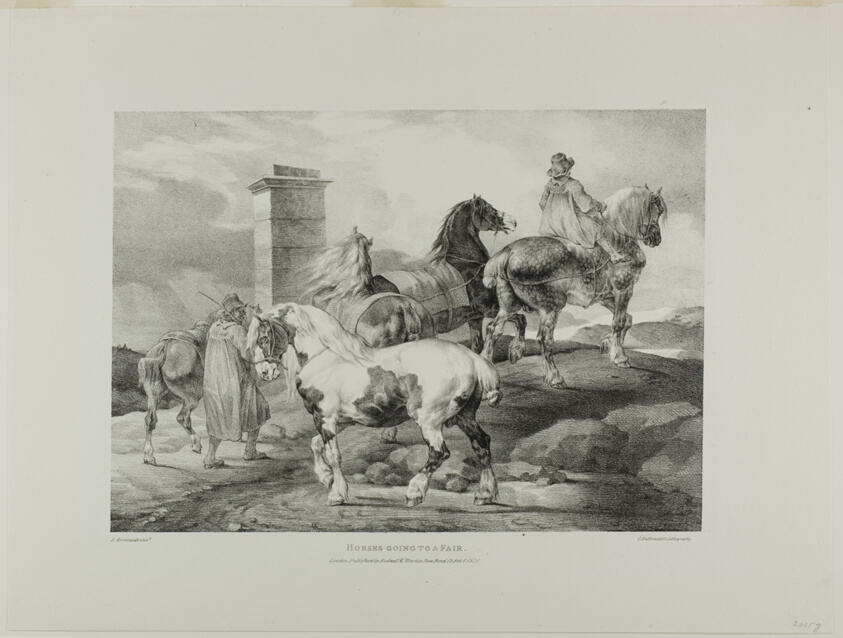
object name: Print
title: Horses Going to a Fair, plate 3 from Various Subjects Drawn from Life and on Stone (The English Suite)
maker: Jean Louis André Théodore Géricault (French, 1791-1824); printed by Charles Joseph Hullmandel (German and English, 1789-1850); published by Rodwell and Martin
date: February 1821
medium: Lithograph in black on ivory wove paper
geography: France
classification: lithograph; print; prints and drawing